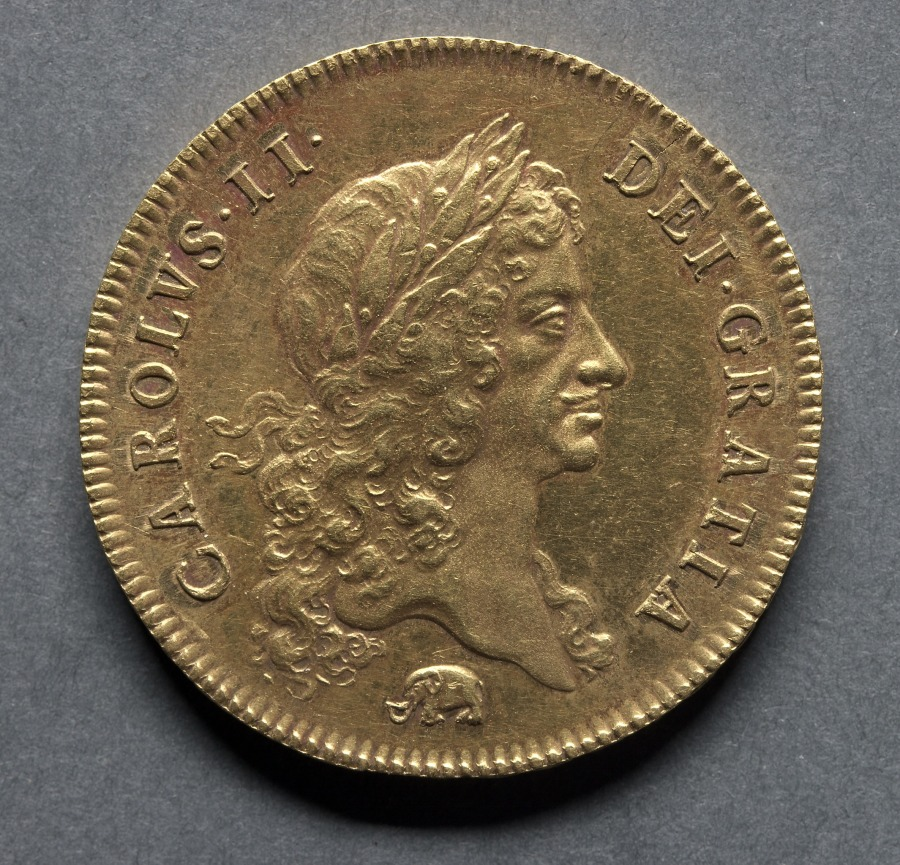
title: Five Guineas: Charles II (obverse); Four Shields (reverse)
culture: England, Charles II, 1660-1685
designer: John Roettier (British, 1631–1703)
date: 1668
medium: gold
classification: Coins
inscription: CAROLVS . II. DEI . GRATIA.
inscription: DECUS ET TUTAMEN ANNO REGNI VICESIMO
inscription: MAG BR FRA ET HIB REX 1668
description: Once the decision was made to reform the coinage of England, and hammered coinage abandoned, the whole range of money was simplified. The guinea was the unit (like the dollar), and multiples of two and five were struck. One of the reasons for turning to mill coins was the long battle against the clipper (the act of shaving precious metal off coins for profit) and forger of coins. Not only were mill coins more exactly shaped, they were thick enough in larger denominations for a legend to be written on their edge as a protection against chipping. Here the edge legend translates: "An Ornament and a safeguard. In the—year of our reign." The regnal year starts from the day the king ascends the throne. Thus the first regnal year of Charles II was calculated from the death of his father, Charles I, in 1649. The year 1668 was therefore the 19th (20th regnal) year of Charles I, whose regnal years ran from January 30 in one year to January 29 of the next.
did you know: The name guinea came from the gold where it was mined, the so-called Gold Coast of Africa on the Gulf of Guinea.